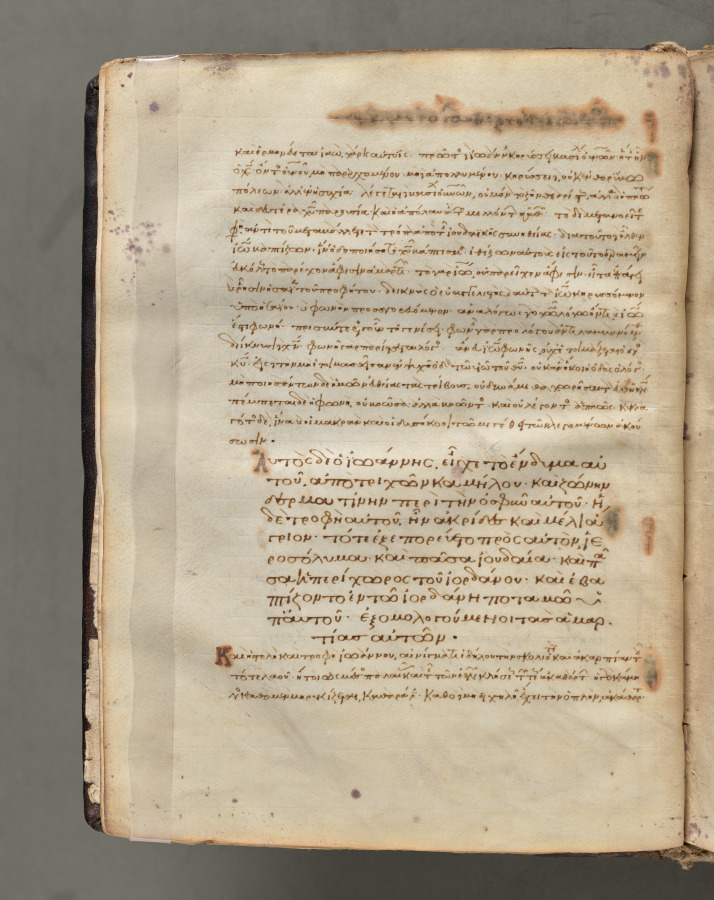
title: Text, folio 12 (verso), from a Gospel Book with Commentaries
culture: Byzantium, Constantinople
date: c. 1000–1100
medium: ink, tempera, and gold on vellum; leather binding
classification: Bound Volume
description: Each of the four gospels in this book opens on a page with brilliantly illuminated borders depicting the author of the text as well as birds-principally peacocks, symbols of the immortality of the soul-and fountains, representing the fountain of life and the salvation of the soul. This volume consists of 428 leaves with texts in Greek. Its level of sophistication suggests that it was probably written and decorated in a monastery in Constantinople.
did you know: Gospel Books were carried in procession through Byzantine churches.